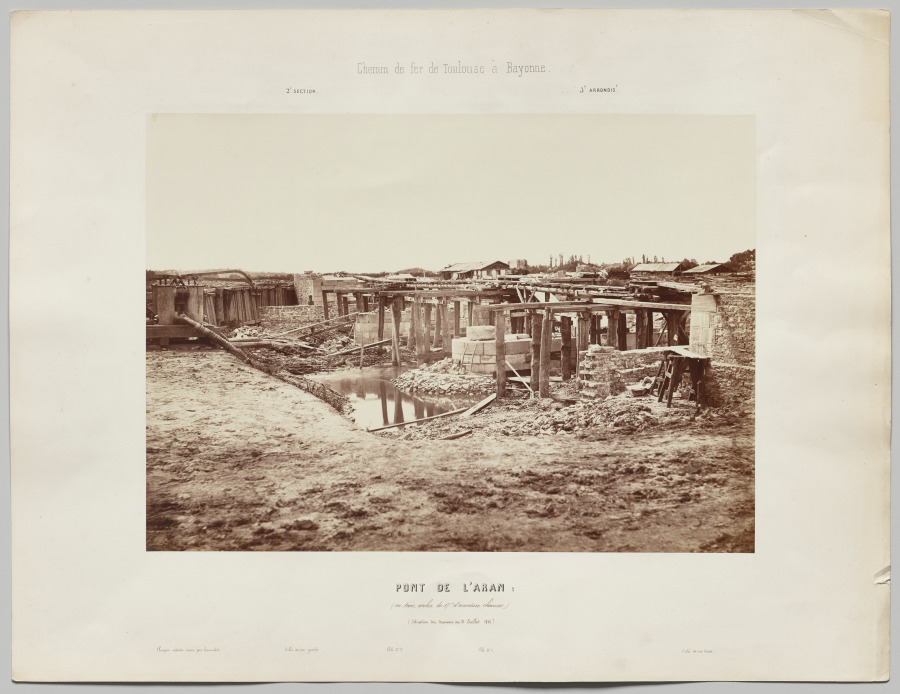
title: Chemin de fer de Toulouse à Bayonne. Pont de l'Aran (en trois arches de 17m d'ouverture chacune). Situation des travaux au 21 juillet 1861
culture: France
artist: Édouard Baldus (French, 1813–1889)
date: 1861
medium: albumen print from collodion negative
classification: Photograph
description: Edouard Baldus, the most important French 19th-century architectural photographer, here reveals the process of constructing a bridge. In 1861 he was commissioned by the railway company that owned the principal route across southwest France to document the region’s landscape, towns, monuments, and railroad structures such as bridges and viaducts.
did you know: The rise of photography coincided with the creation of the railroads and the modernization of France.